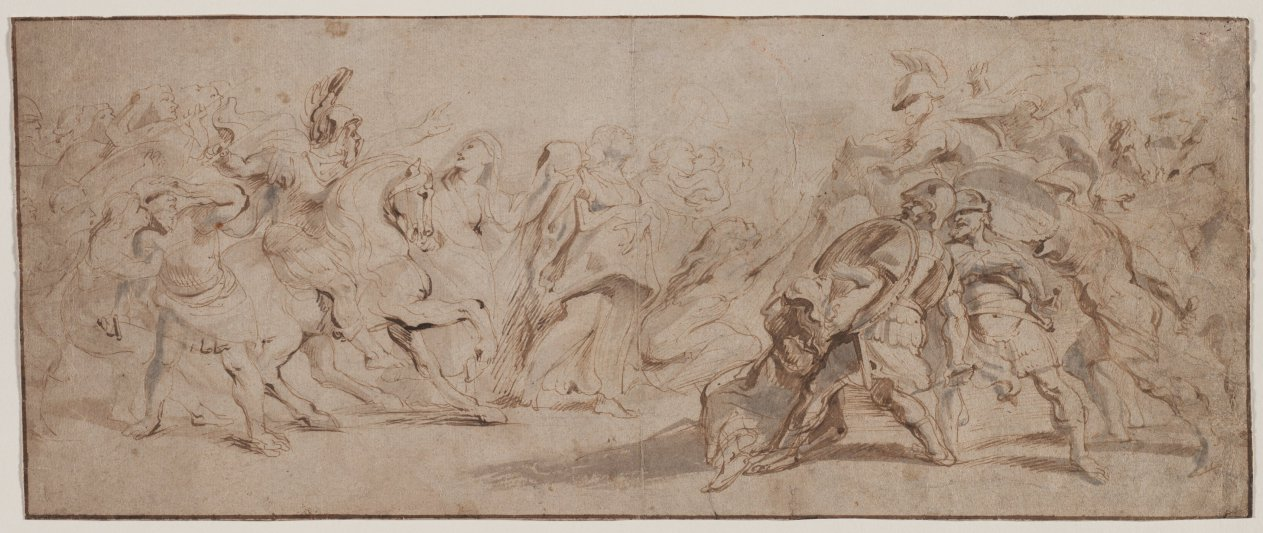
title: Reconciliation of the Romans and the Sabines (recto)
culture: Flanders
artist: Peter Paul Rubens (Flemish, 1577–1640)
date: c. 1632/35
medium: pen and brown ink and brush and gray and brown wash; framing lines in brown ink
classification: Drawing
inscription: ON AN OLD SUPPORT (now removed): in graphite: 200 x 489 mm ; in graphite: Rubens [JUS ?] ; stamped in red ink: ZOLL / I-26 / + [circled] (according to departmental cataloging sheet this is a Swiss customs stamp) ; ON AN OLD SUPPORT (now removed): embosed in red ink: P.P. Rubens ; ON OLD BACKING? (now removed): in blue ink: Versöhnung der Römer und Sabiner / auf der Rückseite: Venus entwaffnen Mars / ausst. von Rubens zeichnungen, / antwerpen, Rubenshaus sommer 1956 No 117 ; in graphite: Royal accademy, winter exhibition 1953/4